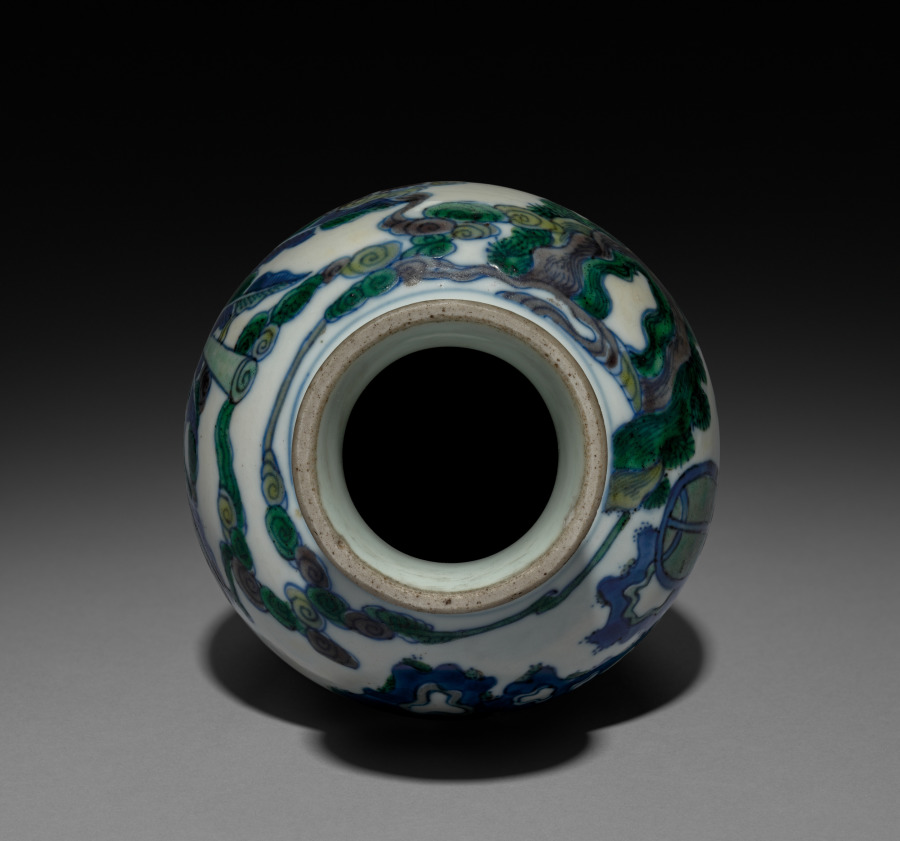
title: Vase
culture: China, Jiangxi province, Jingdezhen kilns, Ming dynasty (1368-1644), Wanli reign (1572-1620)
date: 1573–1620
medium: porcelain with underglaze blue decoration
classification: Ceramic